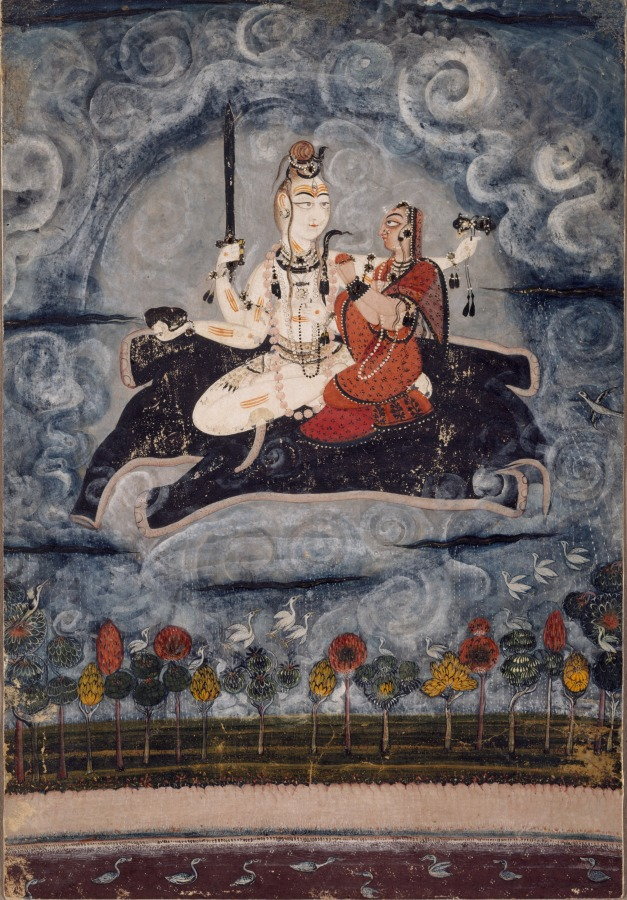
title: Shiva and Devi on Gajasura's hide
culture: Northern India, Pahari kingdoms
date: c. 1675–80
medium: Gum tempera and silver on paper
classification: Painting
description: These divine lovers embody the duality of opposites: male/female, yogi/princess, death/ birth, and destruction/creation. Their gazes are locked on each other, linking them in loving unity as they float on the skin of an elephant demon through swirling monsoon clouds above the earth. The god Shiva looks like a yogi with matted locks of hair entwined with serpents, white skin smeared with ash from funeral pyres, the third eye of true knowledge, triple-line sectarian marks, a garland of severed heads, and the leopard-skin loincloth. In three hands he holds emblems of destruction: skull cup, sword, and a drum that beats the rhythm of time. His fourth hand rests tenderly on the shoulder of his wife, the goddess Devi, also known as Parvati, who perches on his lap, her hands in a gesture of honor.